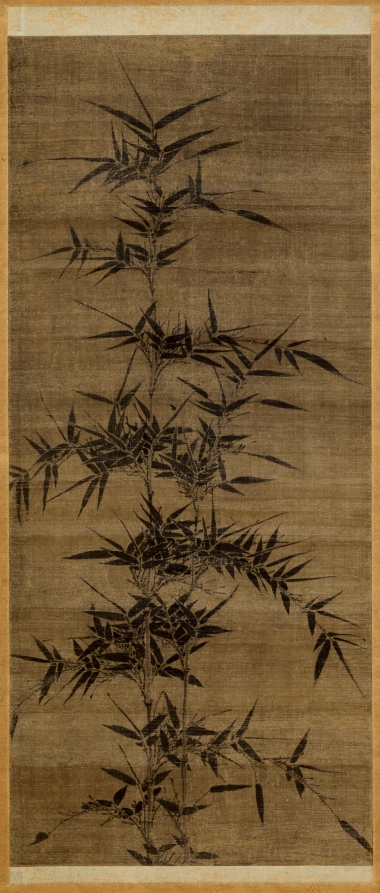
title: Ink Bamboo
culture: China, Southern Song dynasty (1127-1279)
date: 1200s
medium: hanging scroll; ink on silk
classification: Painting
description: This deceptively simple composition features two upright stalks of bamboo with leafy stems extended to fill the silk. The painter sensitively balanced ink tones and brushstrokes. The leaves that cross in front of other leaves are outlined in clear silk.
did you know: In traditional Chinese culture, bamboo symbolizes a gentleman's virtuous resilience and flexibility.